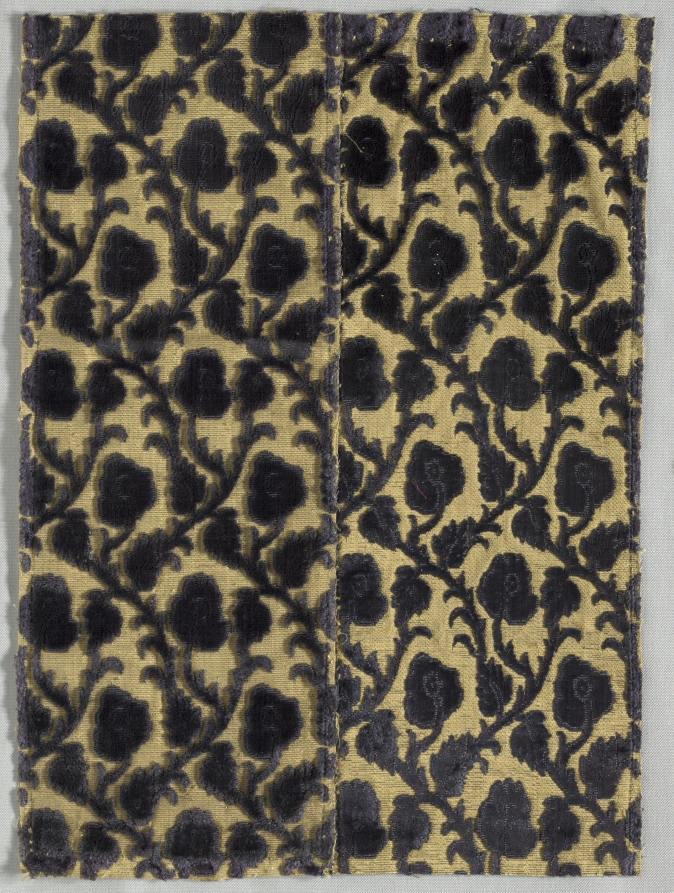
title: Brocade Textile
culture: Italy, 17th century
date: 1600s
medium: brocade; silk and metal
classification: Velvet